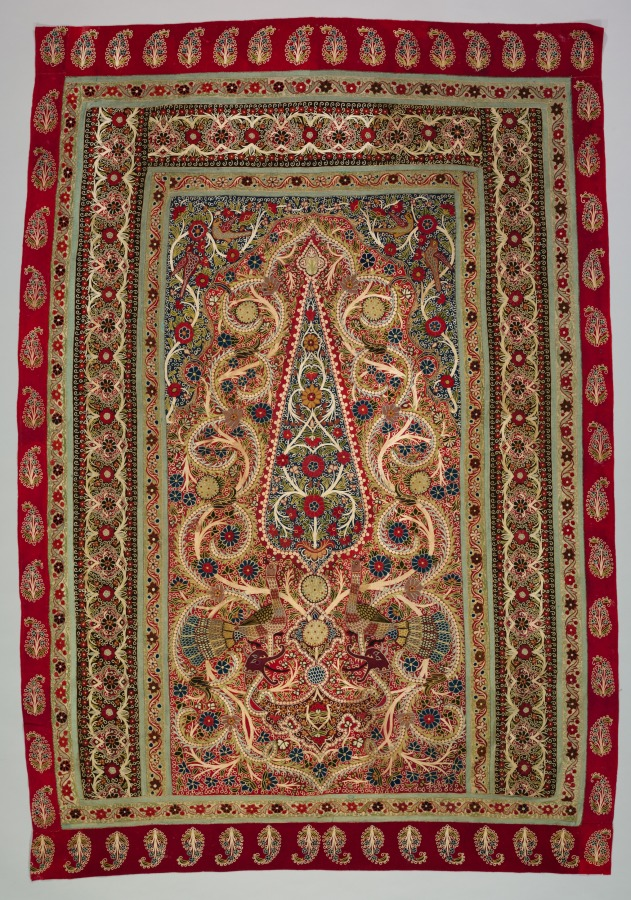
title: Tent Wall Panel(?)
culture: Iran, Rasht, Qajar period (1779-1925)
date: 1800s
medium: Wool: inlaid work; silk: embroidery, chain stitch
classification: Embroidery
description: Elaborate arched panels with multiple borders similar to this textile formed the mosaic-like interior walls of imperial tents. Here, the field is dominated by a richly decorated cypress tree above peacocks and dragon heads on an ornate foliate ground. We look upon the gardenscape through a niche (mihrab) formed by this foliage. Bright white silk “pearl” outlines, vines, and ringlets in chain-stitch embroidery enliven the pattern on contrasting colors of fulled wool. Internationally fashionable botehs, or paisleys, decorate the outer red borders.This technique has been referred to by many different names including: Rasht work, Resht work, Rashti-duzi, Rachti-douzi, embroidery applique, mosaic embroidery, piecework, patchwork, embroidery brocade, and inlaid patchwork. Many of these terms are to various degrees inaccurate descriptions of this technique. Perhaps the most practical term is Rasht work, named for the town in Iran where the technique was popularized. It begins as a ground of felted plain weave wool. Desired shapes are then punched out of the ground with a metal die and hammer. The same is done with wool of an alternating color. The edges of the different cut pieces are then embroidered together into various designs using a silk chain stitch (golab-duzi). Although this piecework technique was recorded in Iran in the 1670s, most examples survive from the 19th century, when foreigners praised them as “really [the] most beautiful embroidery.” The technique appears in furnishing fabrics, and horse covers, as well as imperial portraits, including one depicting the Qajar monarch Fath ‘Ali Shah, who ruled in 1797–1837. Sometime after leaving the workshop this panel experienced moth damage; small patches can be seen throughout.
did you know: Generally, Rasht work was made by men. Boys handled the delicate embroidering while older men designed cartoons and punched the wool designs.